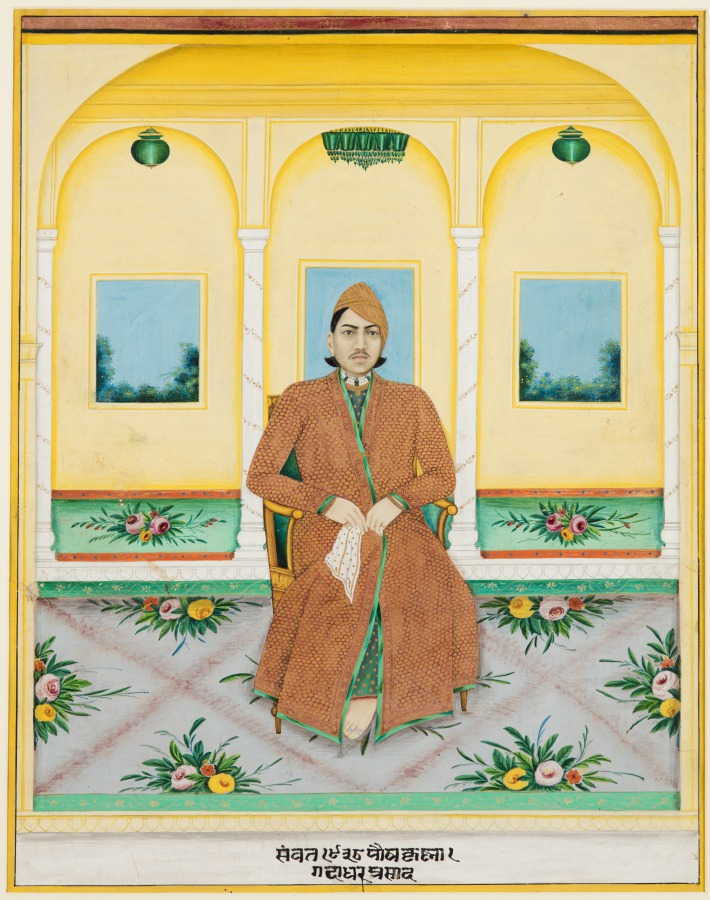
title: Portrait of Gadadhar Prasad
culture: Northwestern India, Rajasthan, Rajput Kingdom of Alwar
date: 1881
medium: gum tempera and gold on cotton cloth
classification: Painting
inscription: saṃvata 1938 poṣa kṛṣnā [pakṣe] 1 gadādhara prasāda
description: The portrait is of a man clad in a sumptuous gold and maroon robe sitting on an armchair in a carpeted interior hung with green glass lamps. European influence is also notable in the front-facing depiction of the subject, instead of the profile-facing depiction in traditional Rajasthani portraiture. The person appears to be from a wealthy background as he wears pearl and emerald necklaces and gold bracelets.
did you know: The subject is wearing toe-rings on his right foot.